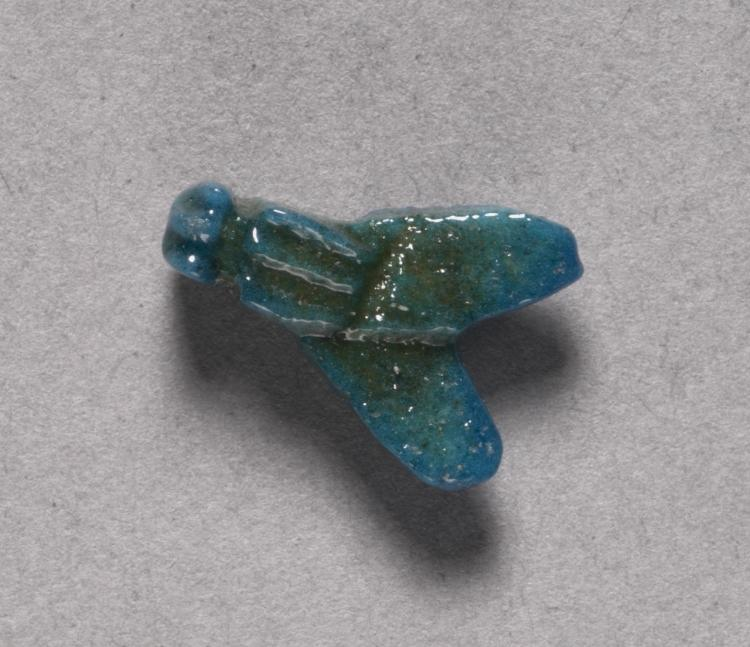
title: Fly Amulet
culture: Egypt, Middle Kingdom (2040–1648 BCE)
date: 2040–1648 BCE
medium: deep turquoise green faience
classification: Amulets